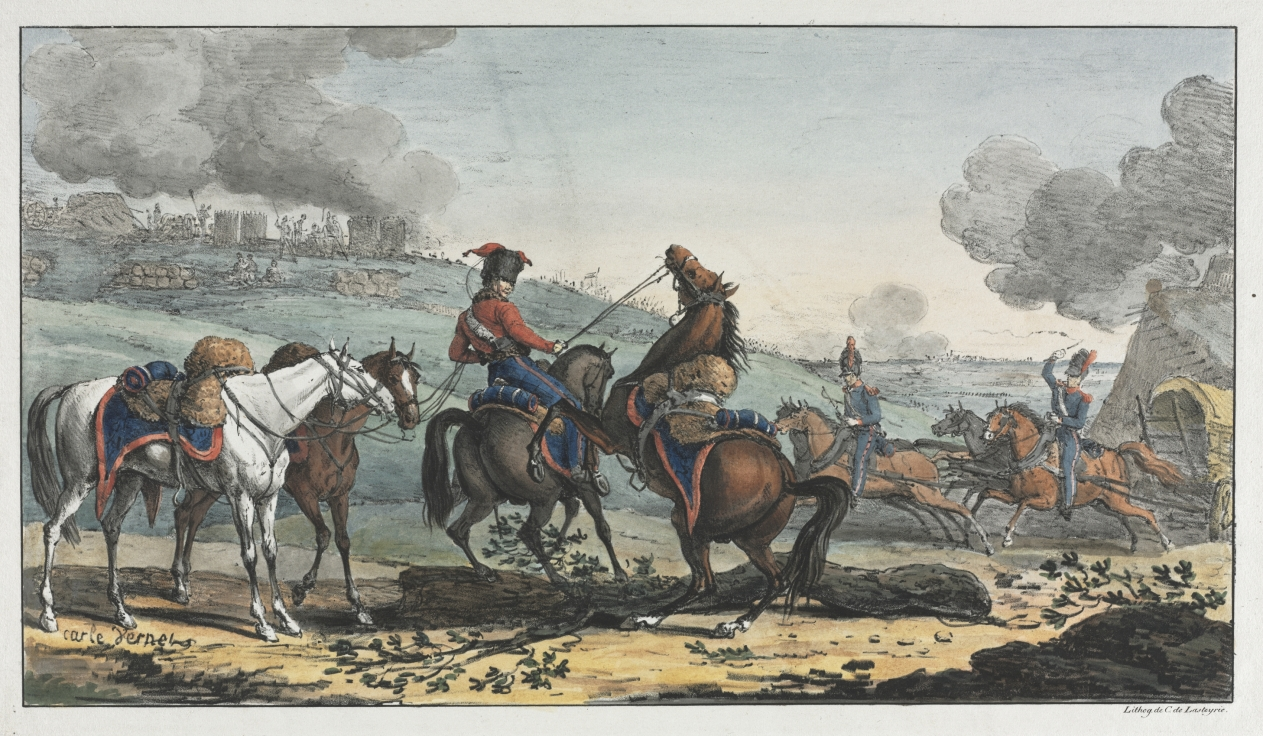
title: Mounted Artilleryman Leading Three Horses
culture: France, 19th century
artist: Carle Vernet (French, 1758–1836)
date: c. 1800–1836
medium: lithograph, hand colored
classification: Print